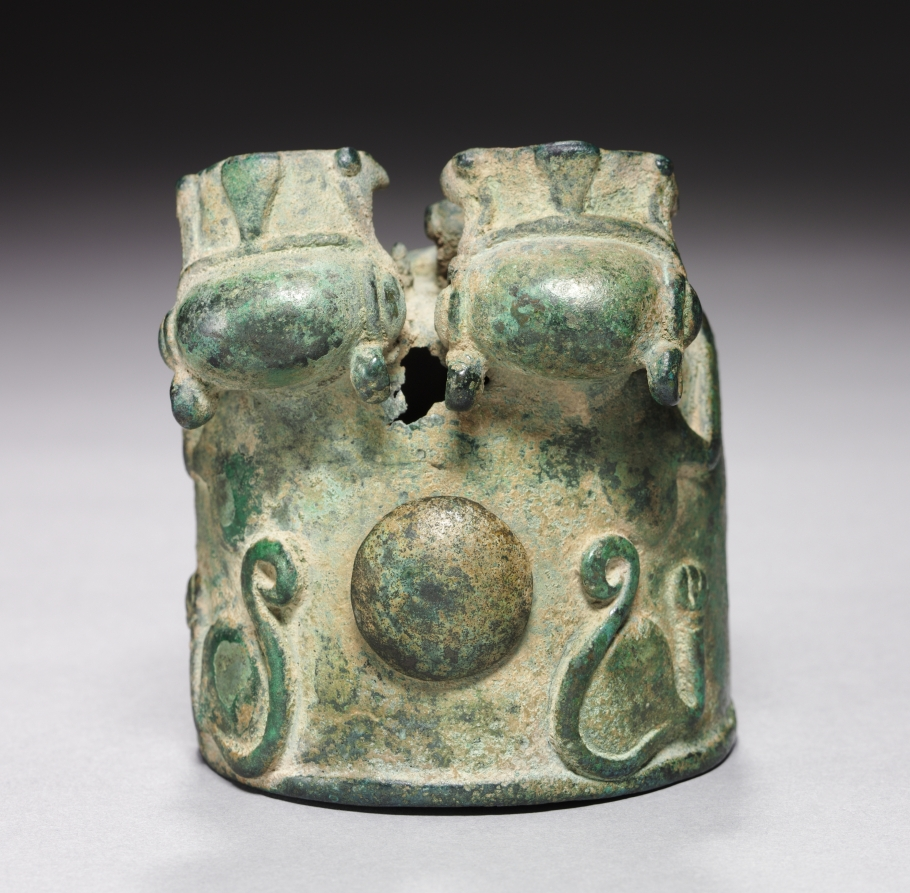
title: Axel Shaft Cup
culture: Iran, Luristan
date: c. 800–700 BCE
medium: bronze, cast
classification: Metalwork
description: Luristan, on Iran's western frontier, and Markik and Amlash in the north were sites of flourishing civilizations. However, since Luristan left little in the way of written records, all that we know about it has been guessed from their works of art. One of the ancient centers of the horse-breeding industry, Luristan is best known for its bronze objects, many of them horse or chariot trappings. Luristan supplied the Assyrian Empire not only with horses but also the hardware associated with them.